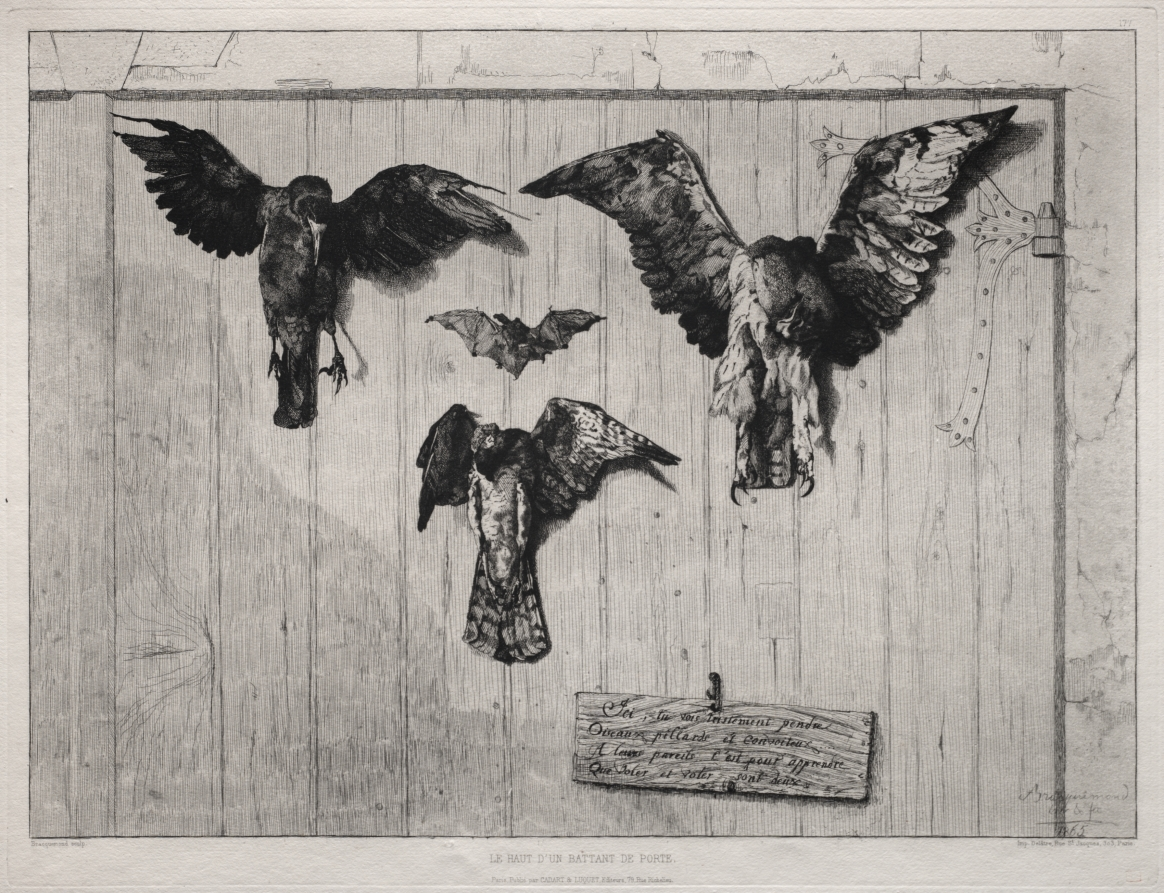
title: The Top of the Swing-Door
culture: France, 19th century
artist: Félix Bracquemond (French, 1833–1914)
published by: Cadart & Luquet 79, rue Richelieu, Paris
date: 1852 (printed 1865)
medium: etching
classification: Print